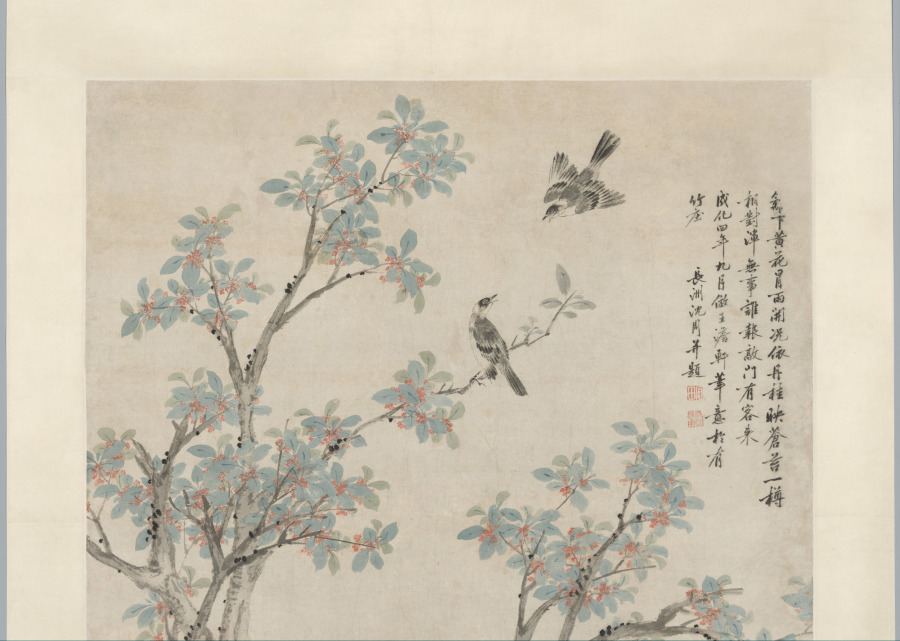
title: Yellow Chrysanthemums and Red Osmanthus in the Style of Wang Yuan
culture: China, Ming dynasty (1368–1644)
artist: Shen Zhou (Chinese, 1427–1509)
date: 1468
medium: hanging scroll, ink on paper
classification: Painting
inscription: Artist's inscription, signature, and 2 seals at upper right: Beneath the fence yellow [chrysanthemum] flowers brave the rain to blossom;/ Still others lean on the red osmanthus tree and dazzle the deep green moss./ With a goblet [of wine] I face them, entirely without concern;/ Who will answer the knocking at the gate where a guest has arrived? In the ninth month of the fourth year of the Chenghua era [1468], I followed the brush-conception of Wang Danxuan 王澹軒 [Wang Yuan 王淵] at the Youzhuzhuang 有竹庄 [House with Bamboo]. Inscribed and [painted] by Shen Zhou 沈周 of Changzhou 長洲. [seals] Shitian 石田; Shen shi Qinan 沈氏启南. trans. HR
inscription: 1 additional inscription, dated 1523, and 2 seals of Wang Chong 王寵 (1494-1533).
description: Shen Zhou, a native from Suzhou, was descended from a prominent land-owning family with strong ties to literati culture. Because Shen Zhou never entered government service, he had ample opportunity to cultivate the arts of painting, poetry, and calligraphy. Chrysanthemums and red osmanthus both bloom in autumn. The deep orange osmanthus flowers emanate a characteristically sweet fragrance. According to his inscription on the painting, Shen Zhou sought to imitate the style of the Yuan dynasty (1271–1368) painter Wang Yuan. His color-filled brushstrokes and washes, however, anticipate the flower painting style of Yun Shouping, whose Peonies are also in the Cleveland Museum of Art collection, https://www.clevelandart.org/art/1967.192. The sheer size and complex composition of this scroll are impressive.